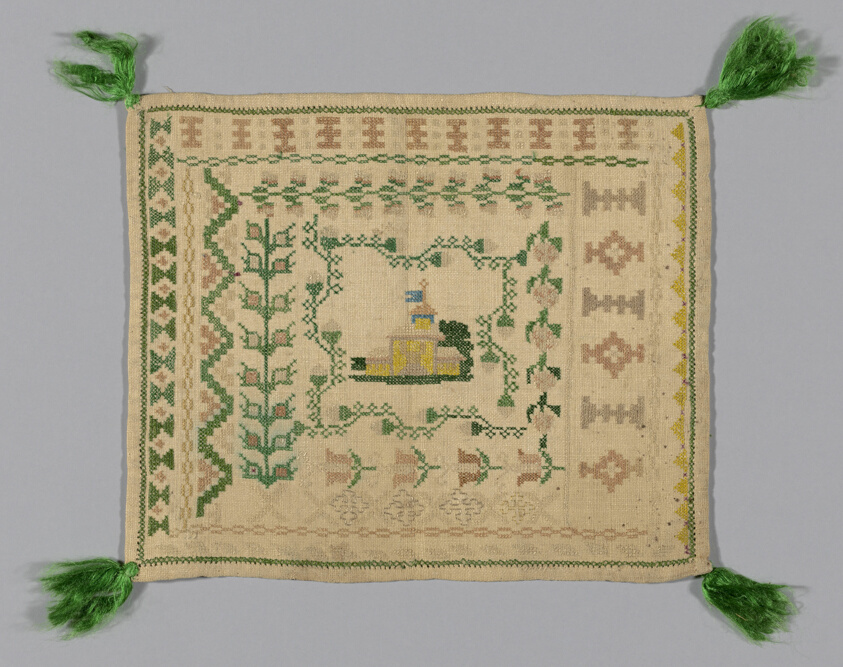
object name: Textile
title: Sampler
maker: France or Netherlands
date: 18th/19th century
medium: Linen, plain weave; embroidered with silk in cross and straight stitches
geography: France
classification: textile; needlework (visual works); sampler